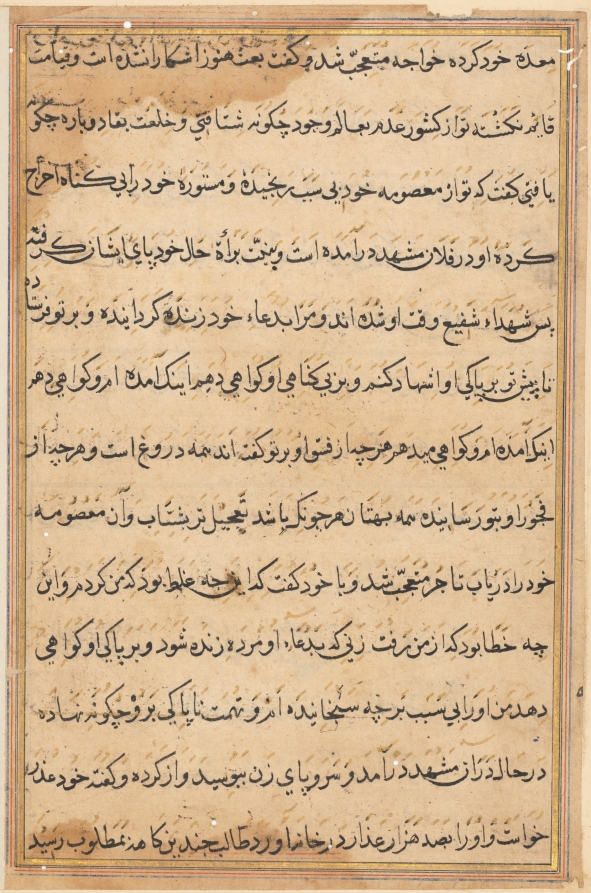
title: Page from Tales of a Parrot (Tuti-nama): text page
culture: Mughal India, court of Akbar (reigned 1556–1605)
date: c. 1560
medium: gum tempera, ink, and gold on paper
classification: Painting